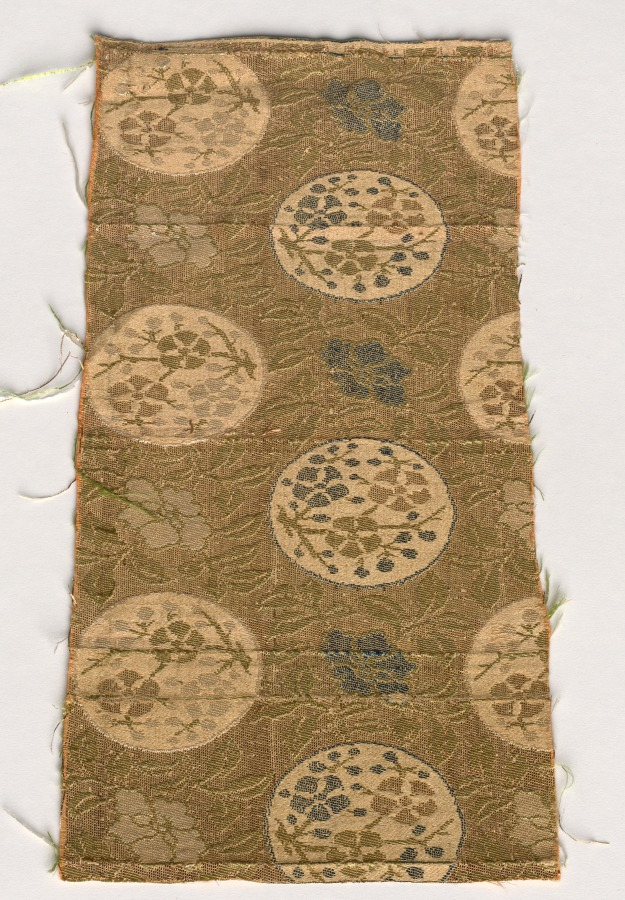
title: Textile Fragment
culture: Japan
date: 1800s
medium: silk, metallic thread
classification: Textile